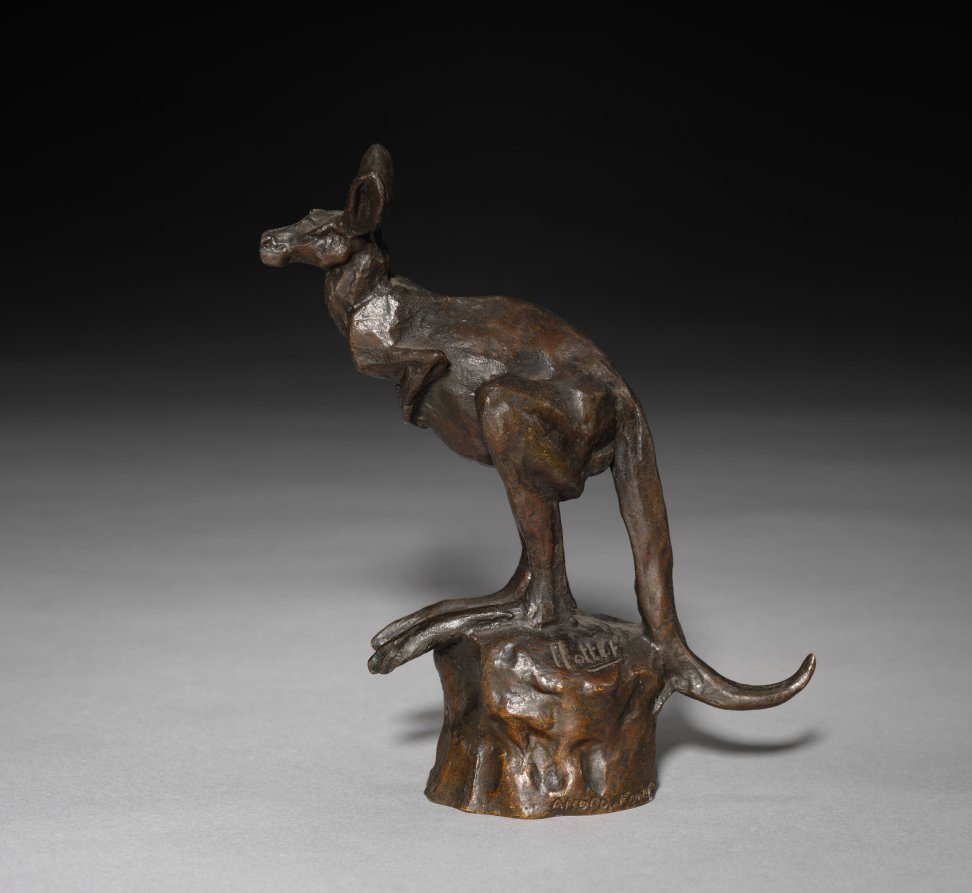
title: Kangaroo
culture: France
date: c. 1900–1925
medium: bronze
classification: Sculpture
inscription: Signed Nottot (?); ANDRO. FONDEUR, lower base